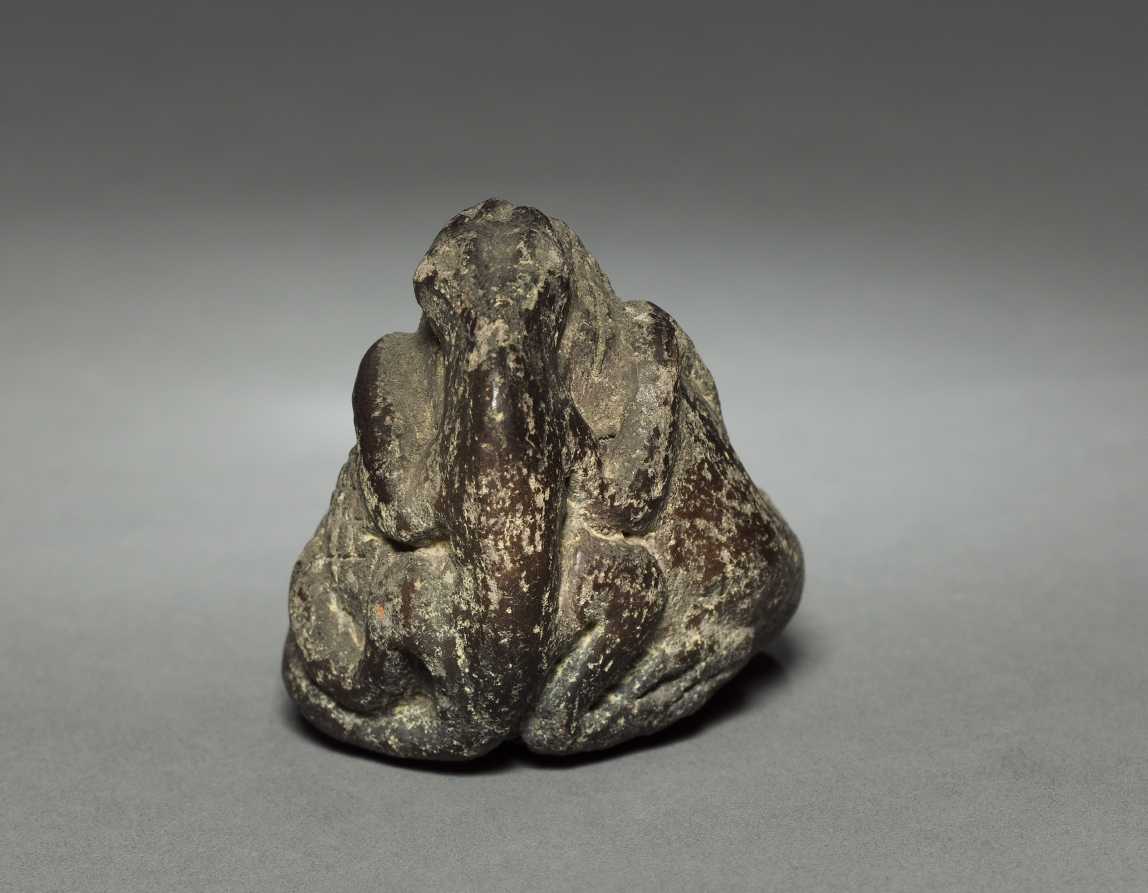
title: Dish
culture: Colombia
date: before 1921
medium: pottery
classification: Ceramic